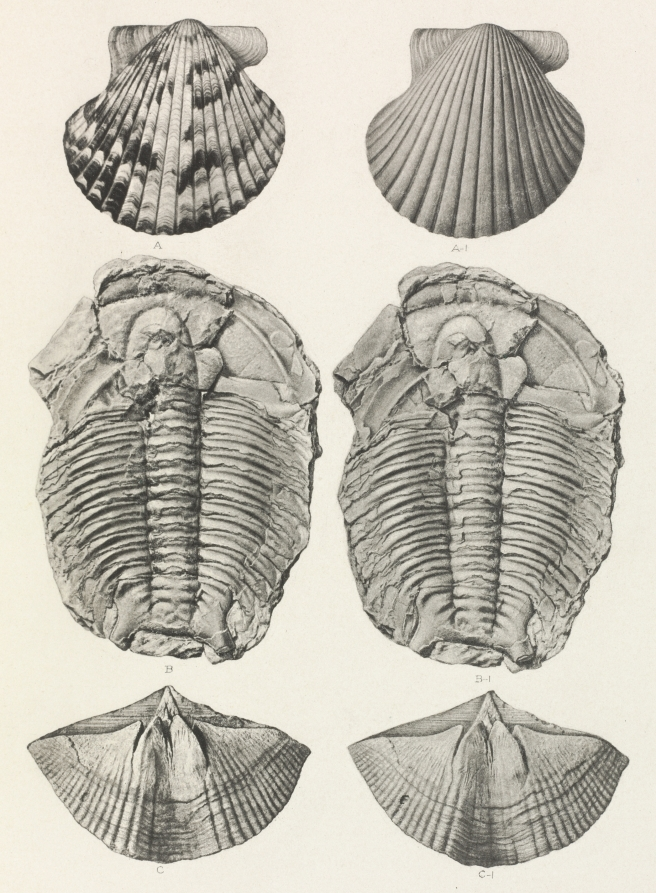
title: Camera Work: Untitled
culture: America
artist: E.M. Bane (American)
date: 1905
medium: photogravure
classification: Bound Volume